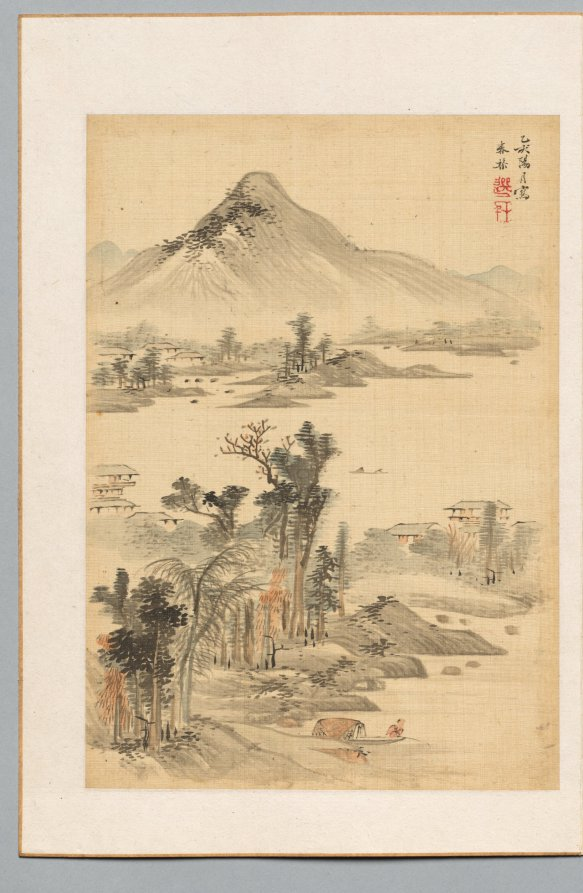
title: Landscape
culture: Japan, Edo period (1615–1868)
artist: Uragami Shunkin (Japanese, 1779–1846)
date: 1815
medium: leaf from a pair of folding albums; ink and light color on paper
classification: Portfolio